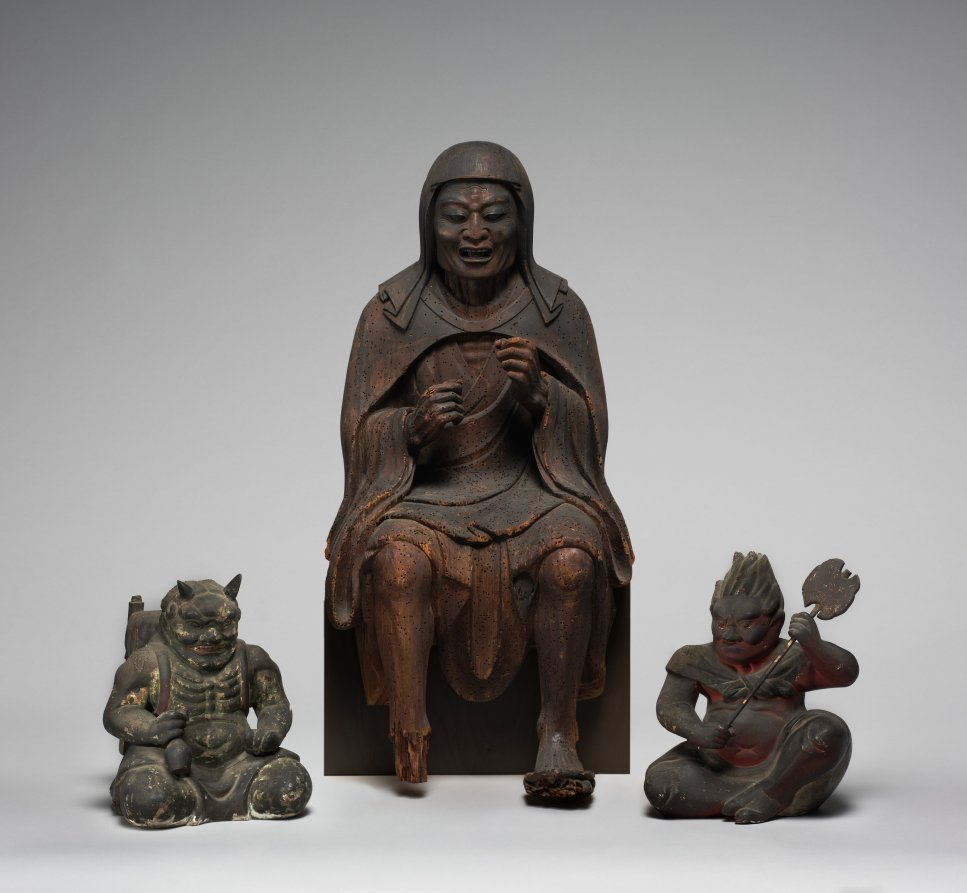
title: Seated Koki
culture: Japan, Muromachi period (1392–1573)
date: 1400s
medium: wood with pigment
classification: Sculpture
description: The axe-wielding red Zenki, and the vase-holding, bamboo backpack-wearing green Koki are both under the mystical control of the monk, En no Ozunu (legendarily 634–701), also known as En no Gyōja, or “En the Ascetic,” considered to have founded Shugendō, a style of religious practice focused on performing austerities in mountainous settings.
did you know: This sculpture was hand-carved and covered with gesso, then paint in green, white, red, yellow, orange, and black, and gilded in select areas.